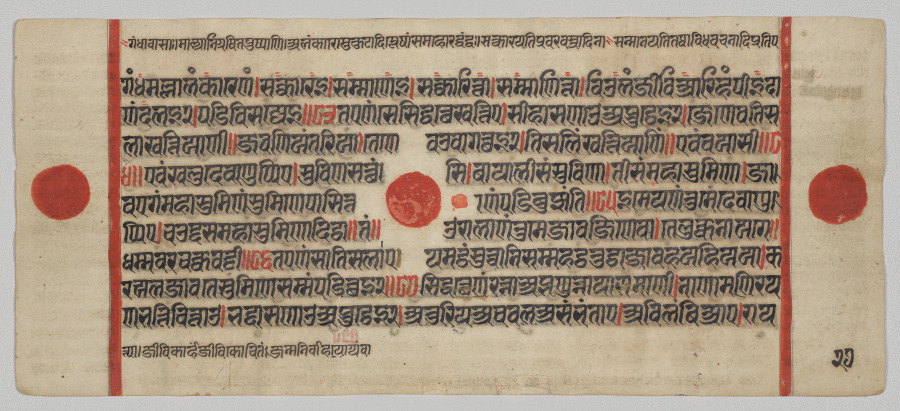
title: Text, Folio 27 (verso), from a Kalpa-sutra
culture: Western India, Gujarat, last quarter of the 15th century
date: c. 1475–1500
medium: Gum tempera, ink, and gold on paper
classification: Painting